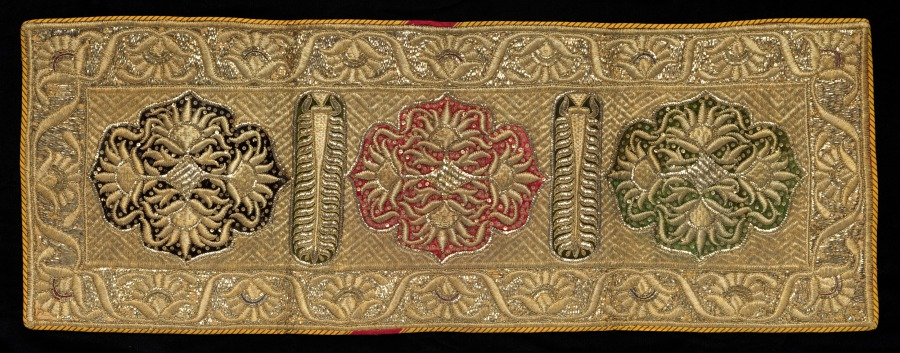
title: Embroidered Strip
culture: India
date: early 1900s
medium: embroidery; cotton, metal and silk thread, sequins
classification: Embroidery